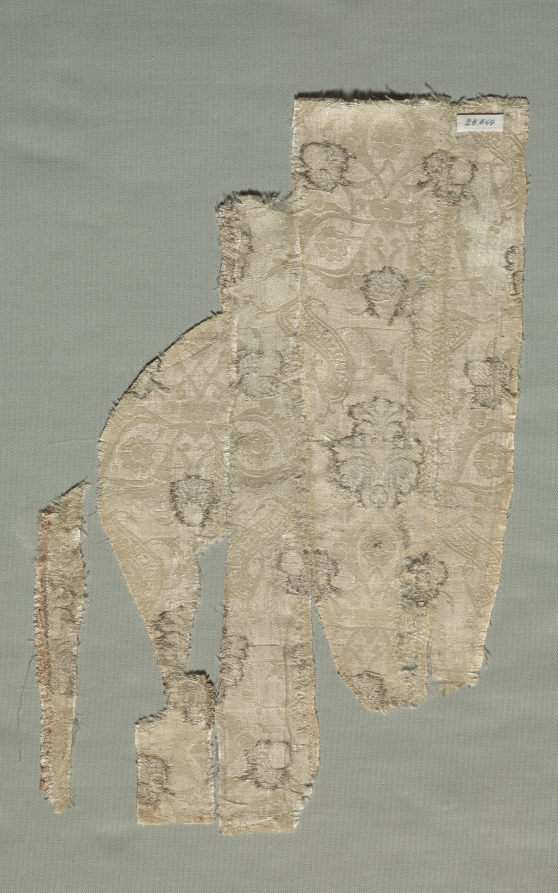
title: Silk Fragment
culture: Italy, second half of 14th century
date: 1350–1399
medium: lampas weave, brocaded; silk and Cyprian gold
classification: Textile